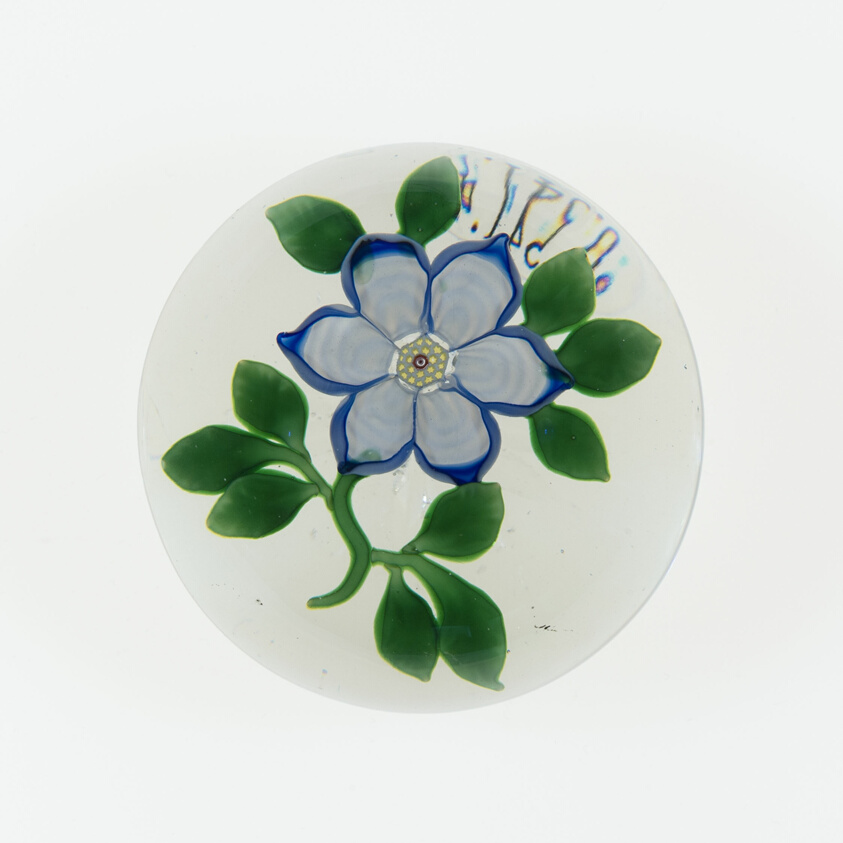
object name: Glass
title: Paperweight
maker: Baccarat Glassworks (Cristalleries de Baccarat); Lorraine, France, founded 1764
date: c. 1845–60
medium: Glass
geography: Baccarat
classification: paperweight; glass